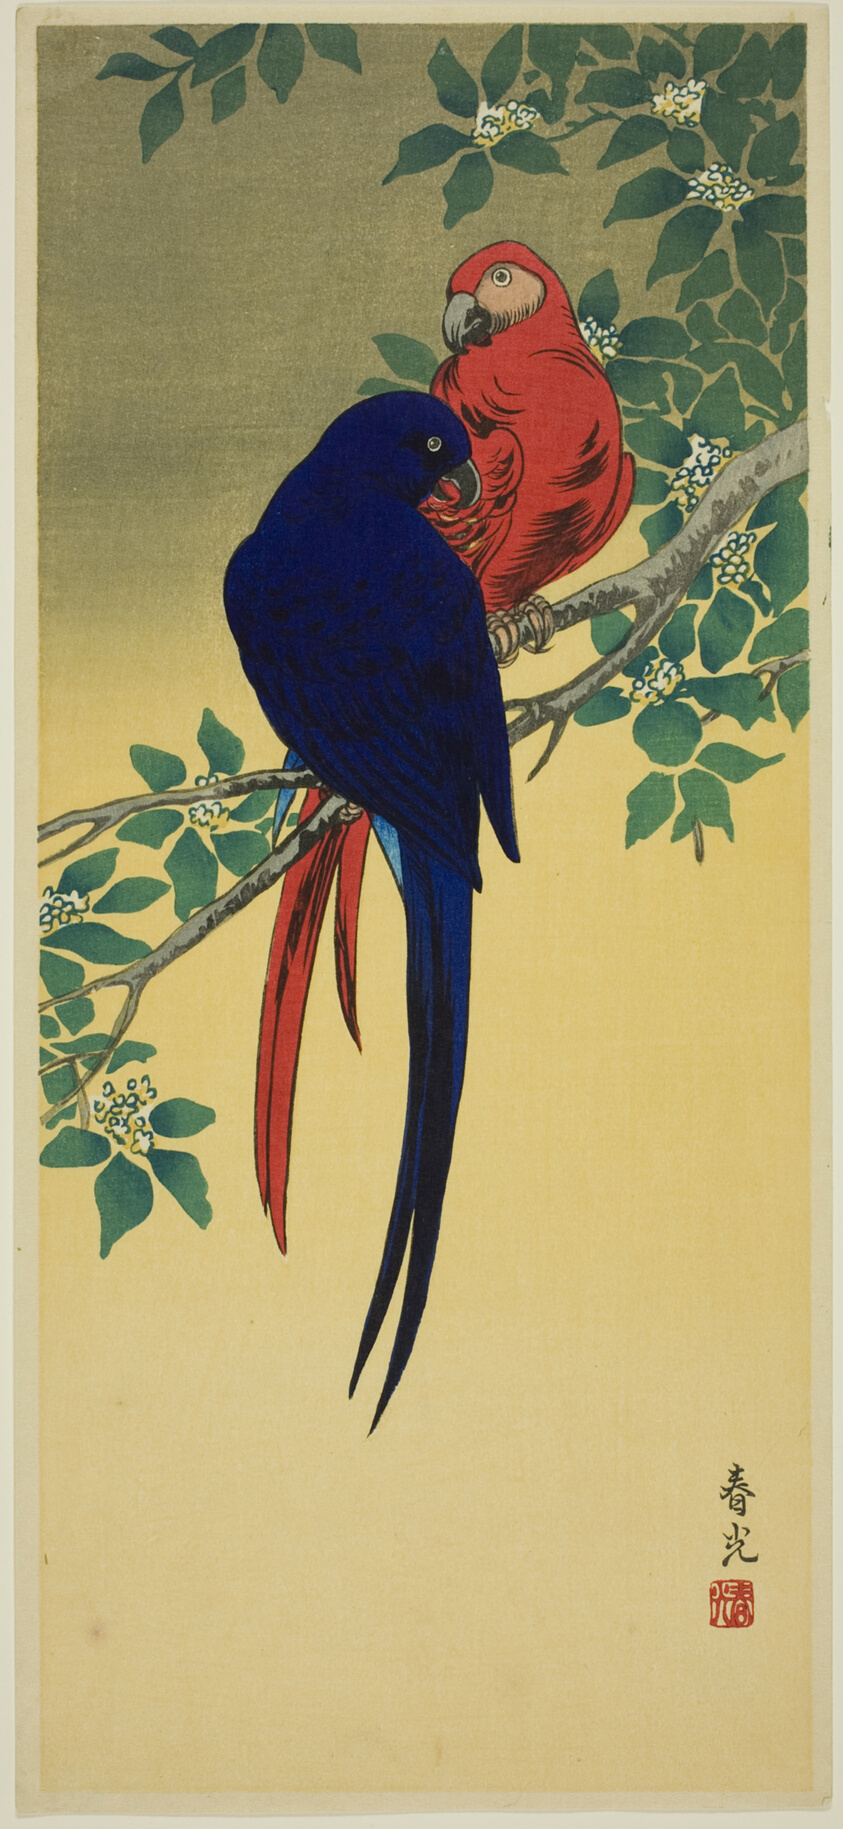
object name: Print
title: Blue and Red Macaws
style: Japanese (culture or style)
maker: Shunko (Harumitsu); Japanese, dates unknown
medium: Color woodblock print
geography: Japan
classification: woodblock print; print